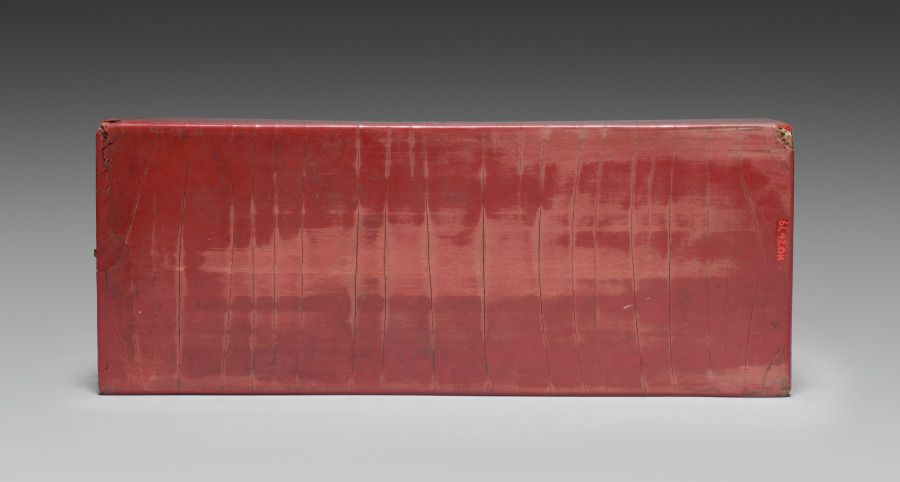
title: Drawer for a Tihong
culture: China, Ming dynasty (1368-1644), Wanli reign (1572-1620)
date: 1585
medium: carved cinnabar lacquer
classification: Lacquer